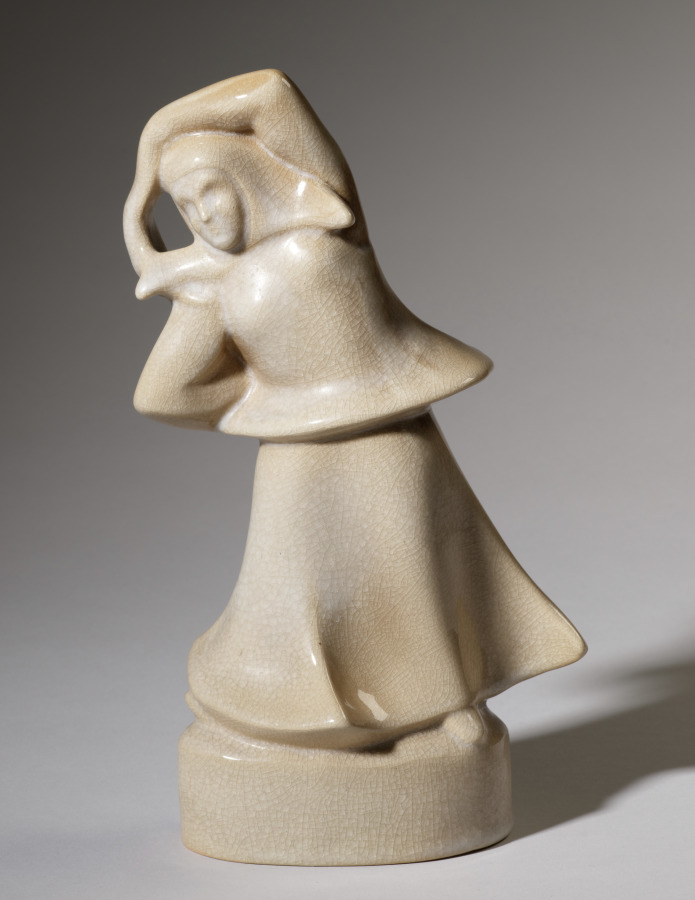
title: Dancer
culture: America, Ohio, Cleveland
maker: Cowan Pottery Studio (America, Rocky River, Ohio, 1920–1931)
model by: Alexander Blazys (American, born Russian Empire [now Lithuania], 1894–1963)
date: 1927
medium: mold-made ceramic, glazed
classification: Ceramic